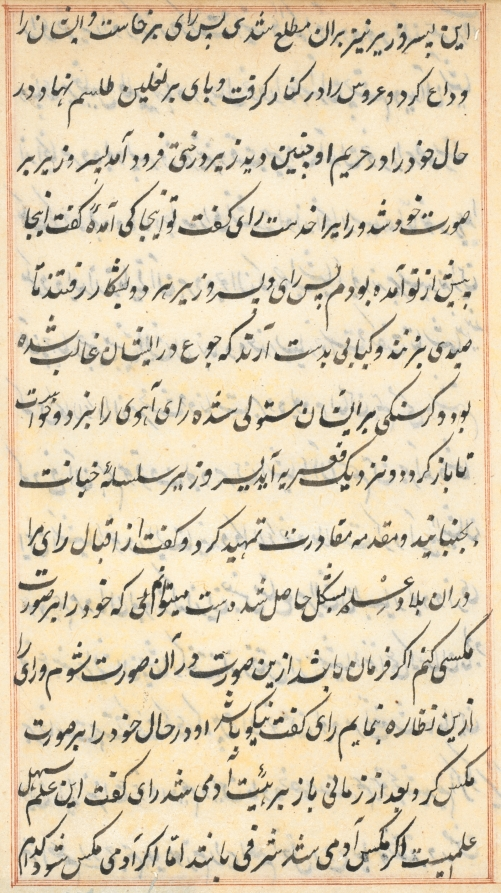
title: Page from Tales of a Parrot (Tuti-nama): text page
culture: Mughal India, court of Akbar (reigned 1556–1605)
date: c. 1560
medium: gum tempera, ink, and gold on paper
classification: Painting